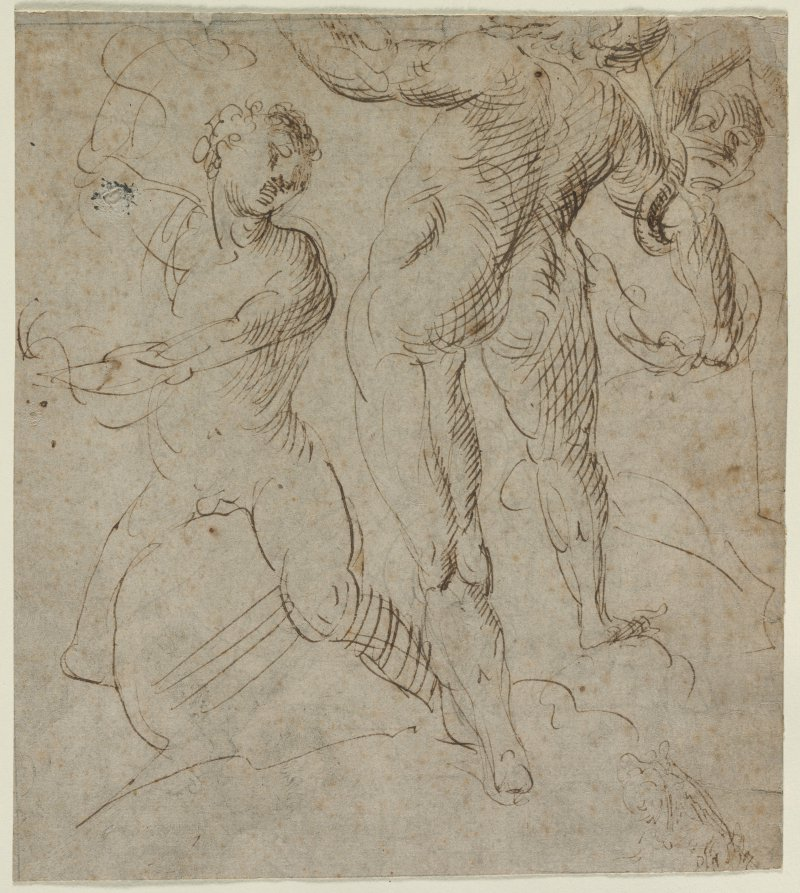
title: Laocoön (recto)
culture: Italy, 16th century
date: second half 16th Century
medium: pen and brown ink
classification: Drawing